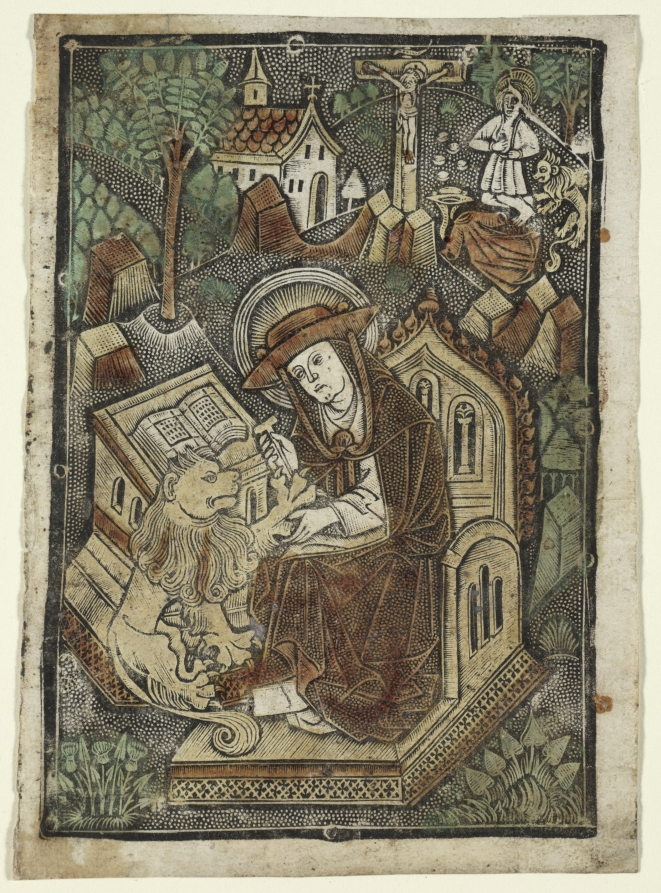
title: St. Jerome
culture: Germany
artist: workshop of Kölner Wappenschild (German)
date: 1500s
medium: engraving, hand-colored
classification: Print